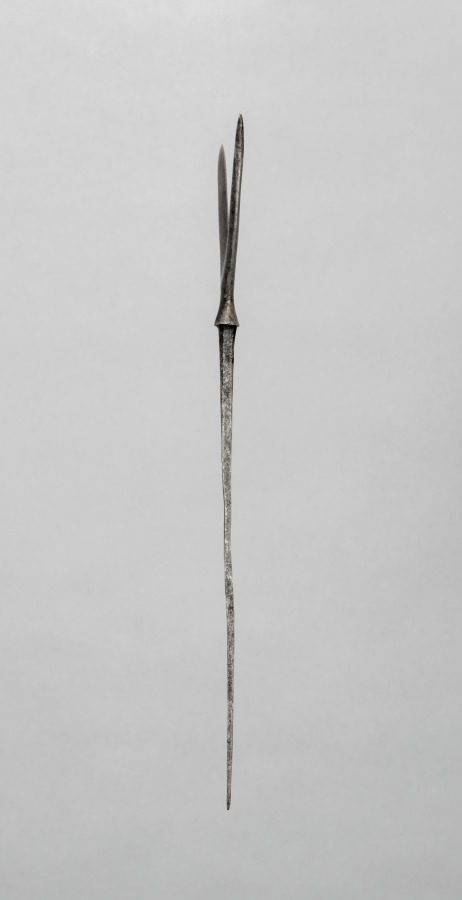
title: Arrow Point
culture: Japan, Edo period (1615–1868)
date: 1700s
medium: steel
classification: Arms and Armor